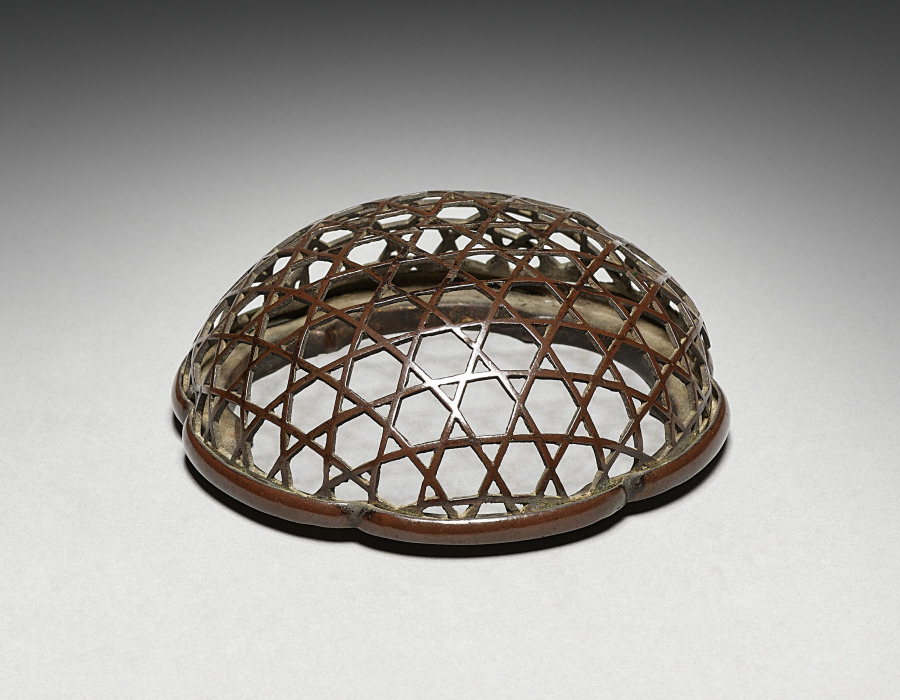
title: Incense Burner (lid)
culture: Japan, Nanbokuchō period (1336–92)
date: late 1300s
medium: bronze with metal rim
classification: Lacquer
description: This container's repeated, undulating, rounded sides evoke waves over which the articulated plovers sweep. The bronze cover (probably a later addition) mimics the design of a fishing weir. Overall, the container brings to mind the seashore. The earthy quality of the lacquered surface demonstrates the interaction between a man-made pattern (the plovers) and the somewhat unexpected surface of a natural material such as wood.